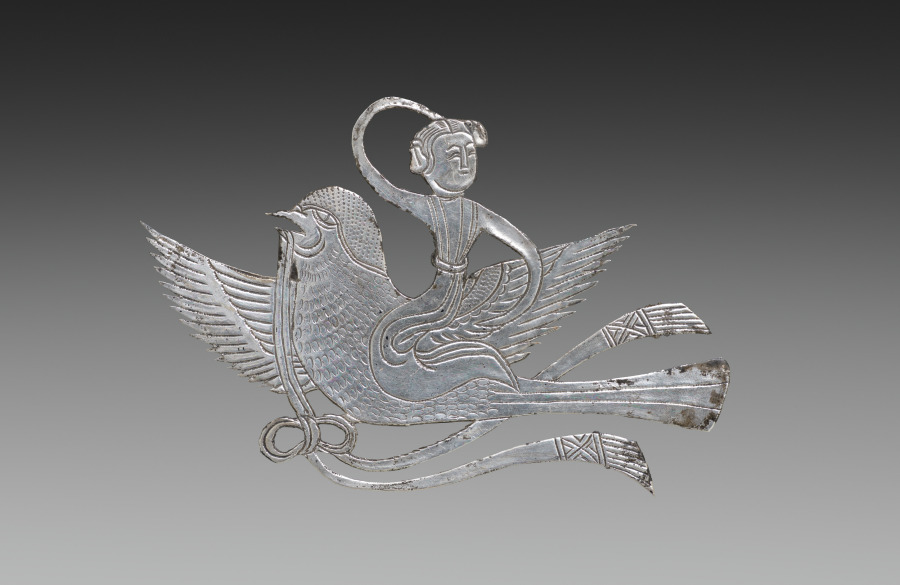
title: Inlay for a Mirror or Box: Lady on a Bird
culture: China, Tang dynasty (618-907) - Song dynasty (960-1279)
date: c. 900–1000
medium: beaten silver with chased details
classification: Metalwork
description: The p'ing-t'o technique of inlaying gold and silver foil on lacquer produced luxurious articles of elegance and fragility. These stray silver inlays were originally mounted on a mirror back or a cosmetic box whose lacquered surface has disintegrated. They combine auspicious symbols of Indian and Chinese origin--human-headed birds whose melodies filled the Buddhist paradise, and bird-riding deities who inhabited the skies of Taoist mythology. Like these imaginary beings, the lions were probably paired in a radial design; at least one has been lost.